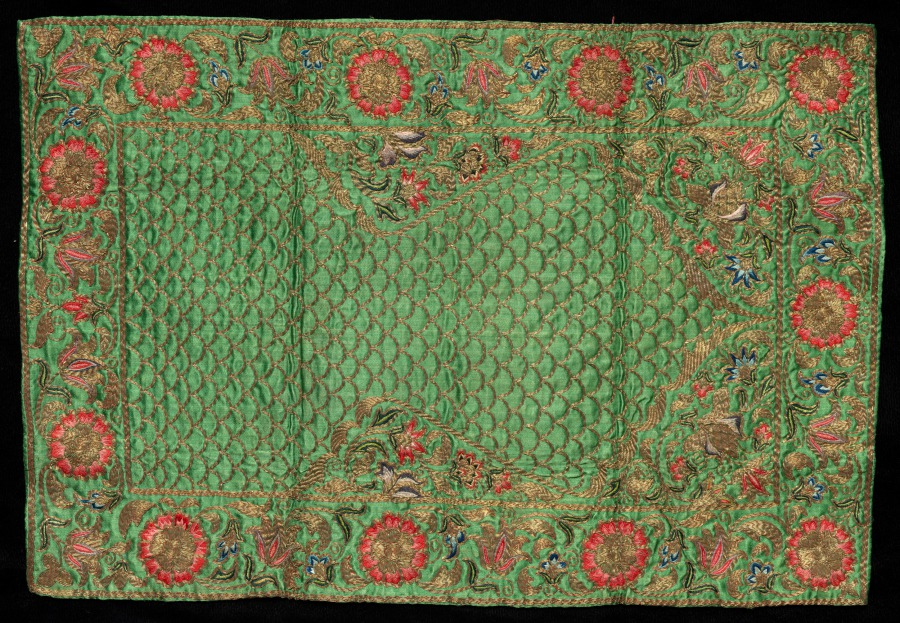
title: Prayer Mat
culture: India, 18th-19th century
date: 1700s - 1800s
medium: embroidery, silk and gold thread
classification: Embroidery